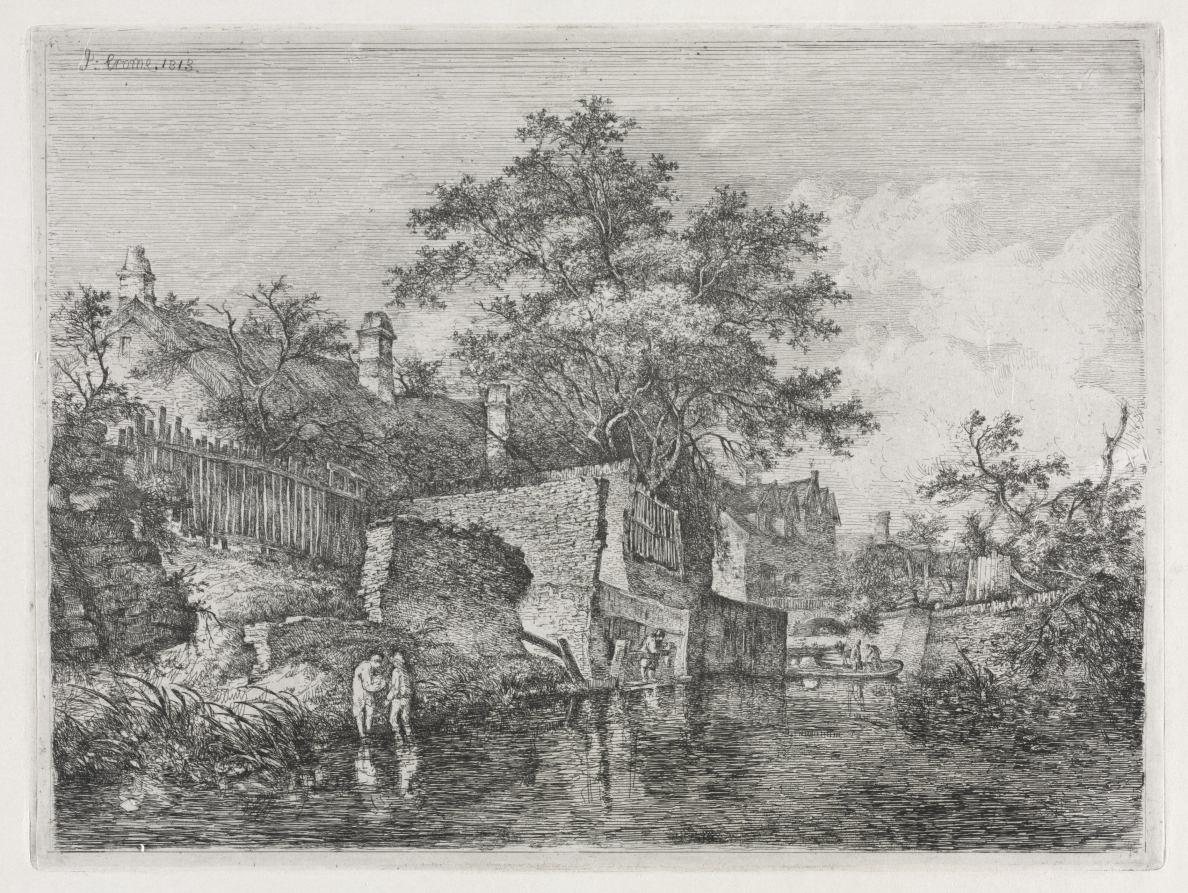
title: Front of the New Mills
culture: England, 19th century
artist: John Crome (British, 1768–1821)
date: 1813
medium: etching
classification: Print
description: Crome's work epitomizes the essence of British landscape art at the beginning of the 19th century, the moment of its greatest flowering. Rooted in an almost mystical commmunion with nature, the artist's purpose was to express the true naturalism of landscape, a realism of light, air, and weather not seen before. He became interested in etching because he understood its potential for spontaneity, yet he feared his etchings would not be admired because they were, by conventional standards, unfinished and sketchy. In fact, it is precisely the freedom of line, lack of rigidity, and open silvery quality of light that makes them so special and individual. Rather than using prints to just copy his paintings, Crome approached etching as a creative medium with which to capture the special beauty of his native Norwich countryside. It is in early impressions like this one, printed by Crome in small numbers, and now extremely rare, that the delicacy of his technique can be appreciated.